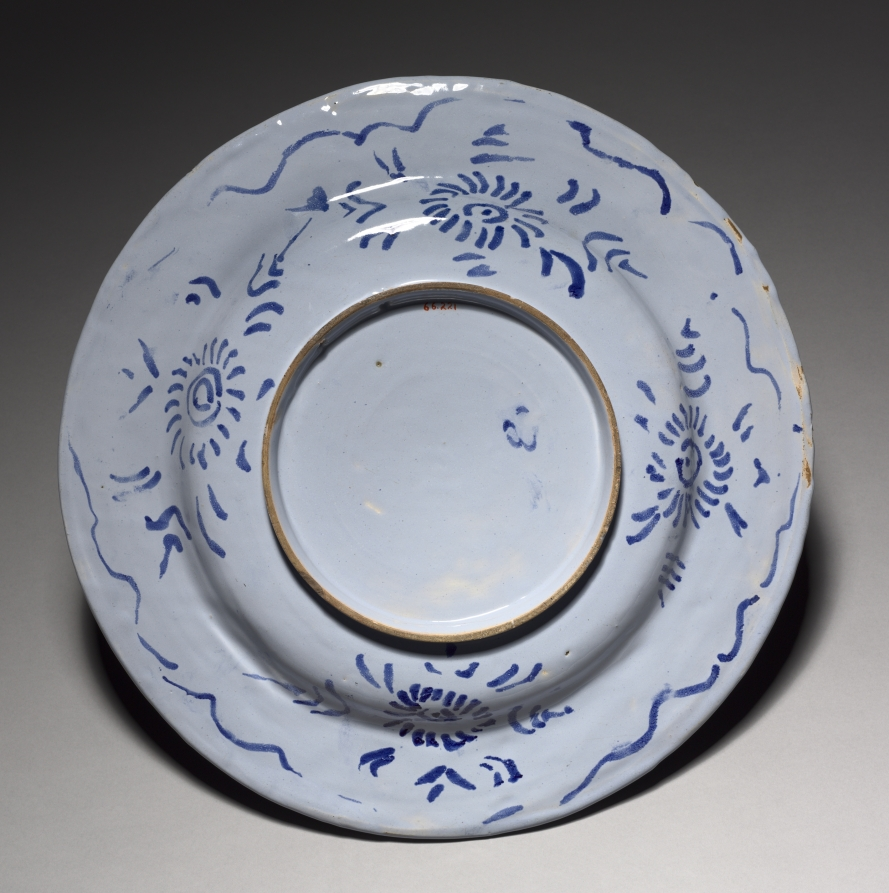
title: Large Plate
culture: France, late 17th Century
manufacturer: Nevers Factory (French)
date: late 1600s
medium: faience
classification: Ceramic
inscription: on front, inscribed: Moderata. durant.